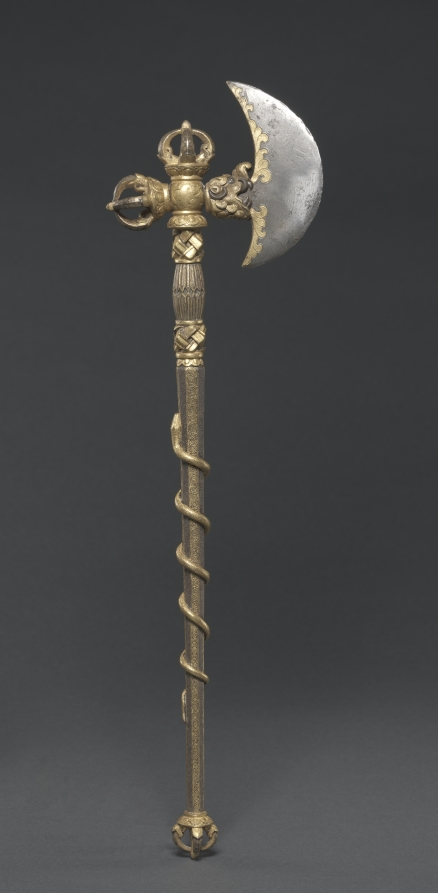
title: Ritual Axe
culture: Sino-Tibetan, Derge School, Yongle period (1403-1427)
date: c. 1407–1410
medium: iron alloy with gold and silver inlay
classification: Metalwork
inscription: Inlaid "Yung-lo" mark (1403-1425) in gold at tope of handle above snake's head.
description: Ceremonial weaponry was used in tantric rituals to combat obstacles to enlightenment, such as ignorance, delusions, and selfishness. In 1407, a high-ranking Tibetan monastic patriarch visited the emperor of the Ming dynasty, known as Yongle. The Yongle emperor presented him with a number of gifts, of which this ritual axe was probably a component, since the axe bears his identifying inscription in a cartouche. Imperial Chinese workmanship is noted in the lush rendering of the lion heads from which the blades emerge, the calligraphic serpentine forms, and the cloud motifs.